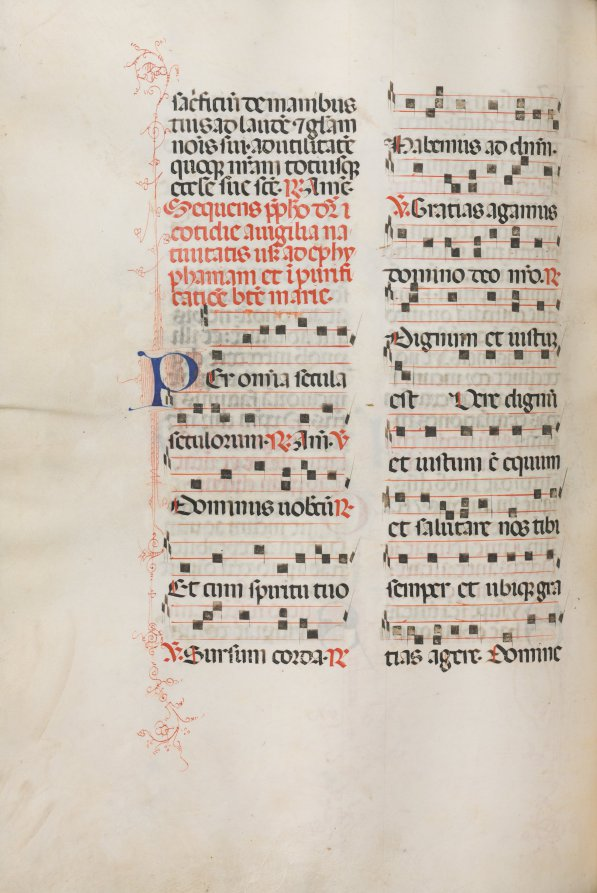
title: Missale: Fol. 176v: Music for various ordinary prayers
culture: Italy, Perugia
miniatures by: Bartolommeo Caporali (Italian, c. 1420–1503)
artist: assisted by Giapeco Caporali (Italian, d. 1478)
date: 1469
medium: ink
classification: Bound Volume